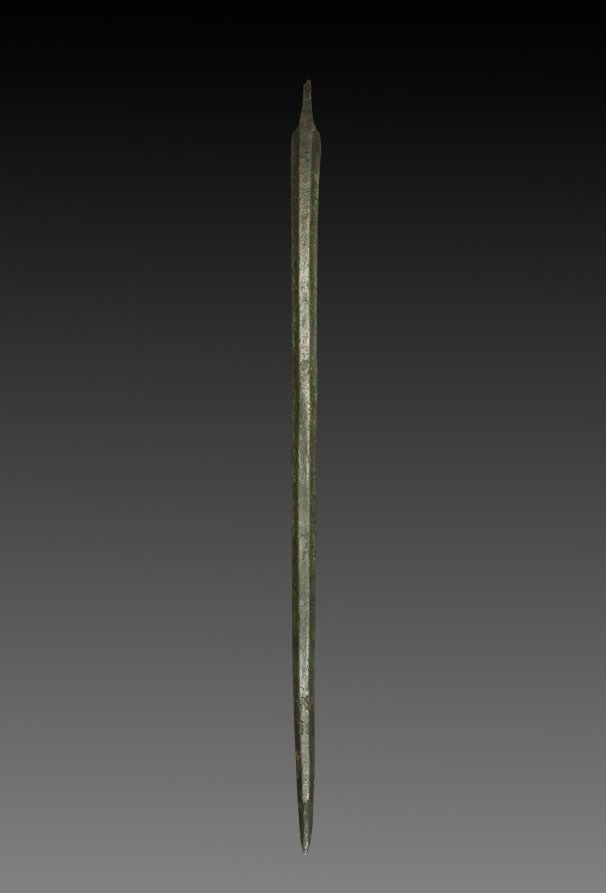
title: Sword Blade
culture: Iran, Luristan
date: 2000–1000 BCE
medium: bronze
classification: Arms and Armor